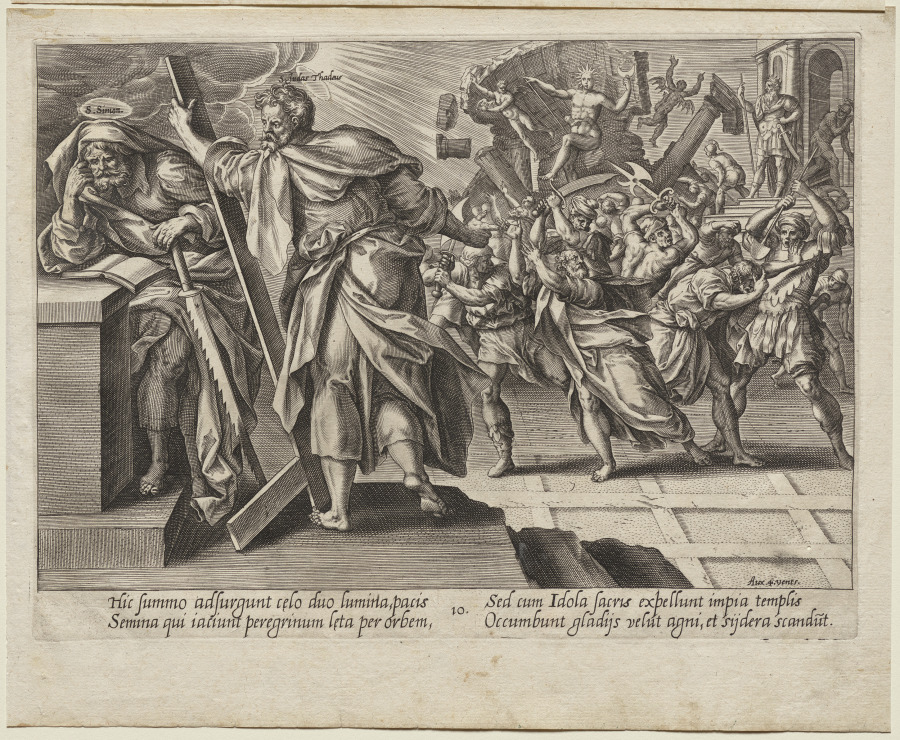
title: Sts. Judas Thadeus and Simon the Zealot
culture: Netherlands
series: Christ, St. Paul, and the Twelve Apostles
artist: Hendrick Goltzius (Dutch, 1558–1617)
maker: after Maarten de Vos (Flemish, 1532–1603)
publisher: Aux Quatre Vents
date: c. 1578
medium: engraving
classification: Print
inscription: Aux.4.vents. bottom right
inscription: Verses in lower margin: Hic summon…et sijdera scandu[n]nt. In nimbus S. Simon. And S. Judas Thadeus. Numbered 10